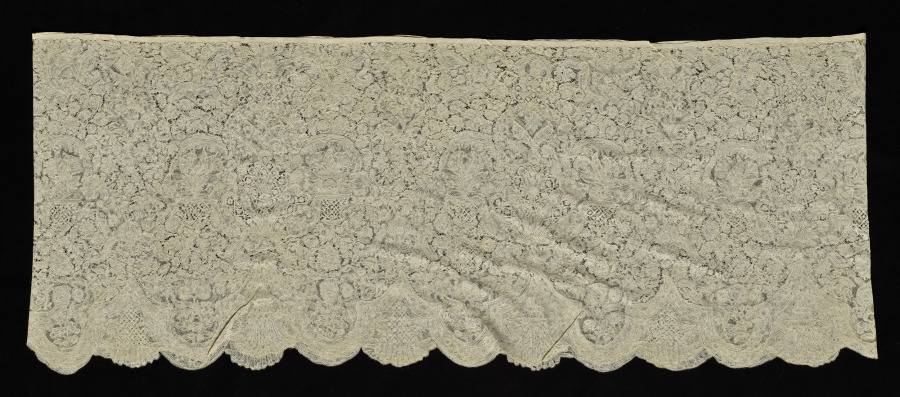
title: Lace Flounce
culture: Belgium, Brussels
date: 1700s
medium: Linen: bobbin lace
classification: Lace